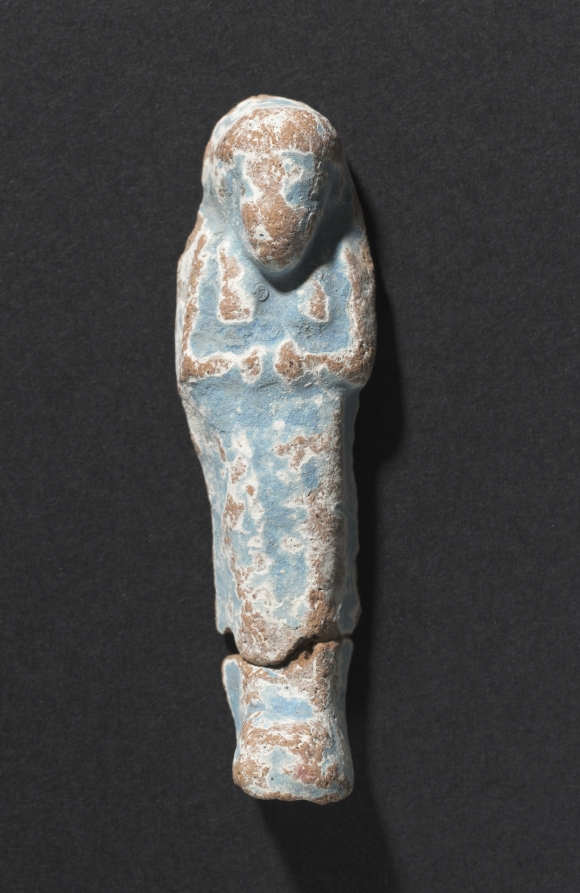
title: Shawabty of Ditamenpaankh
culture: Egypt, Late period (715–332 BCE), Dynasty 25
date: 715–656 BCE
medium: terracotta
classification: Funerary Equipment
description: High demand for shawabtys in the Late Period, a time when as many as 400 or more shawabtys were placed in the tomb with the deceased, gave rise to a specialized container for storing them: the shawabty box. This example is inscribed for the lady of the house, Ditamenpaankh, and was probably one of a pair originally made for her. The single-masted boat on the box's lid is perhaps an allusion to the pilgrimage of the deceased to the holy city of Abydos, the cult city of Osiris, king of the dead. The shawabtys inside are crude, mass-produced examples cast in an open mold. Made of terracotta, their blue paint imitates more costly shawabtys made of faience. As for the shawabty spell, it has been removed from its traditional location on the shawabty's front and relocated onto the sides of box, where it needed only to be written once, thus expediting production.